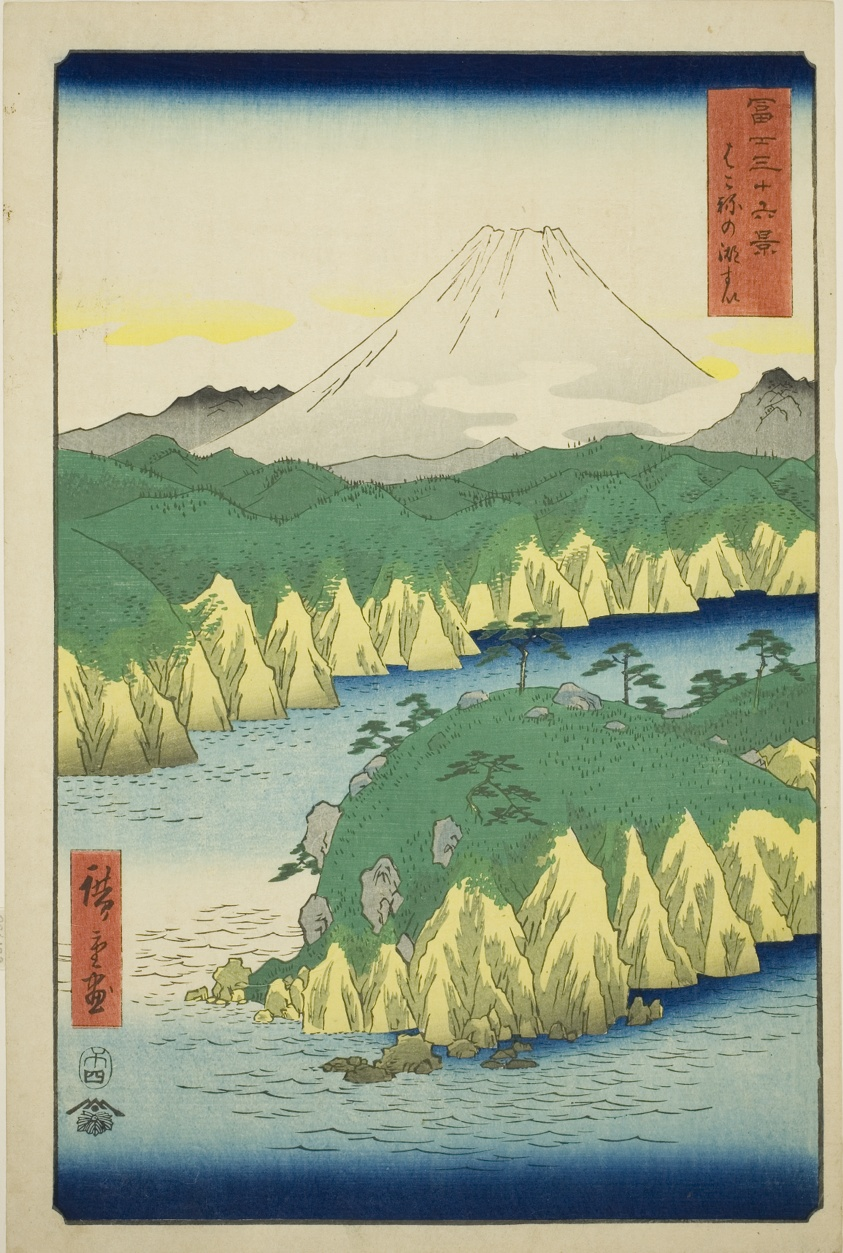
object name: Print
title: Lake at Hakone (Hakone no kosui), from the series "Thirty-six Views of Mount Fuji (Fuji sanjurokkei)"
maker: Utagawa Hiroshige 歌川 広重; Japanese, 1797-1858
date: 1858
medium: Color woodblock print; oban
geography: Japan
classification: woodblock print; print; asian art